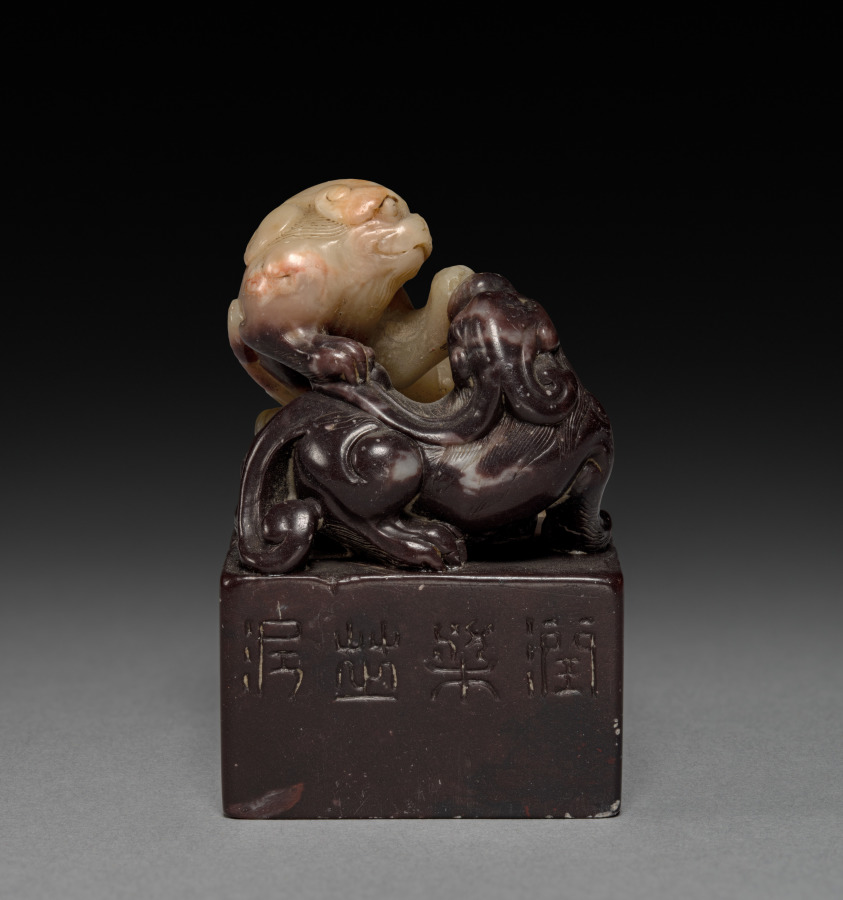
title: Seal with Two Qilin Playing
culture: China, Qing dynasty (1644-1911)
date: 1849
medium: onyx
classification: Stone